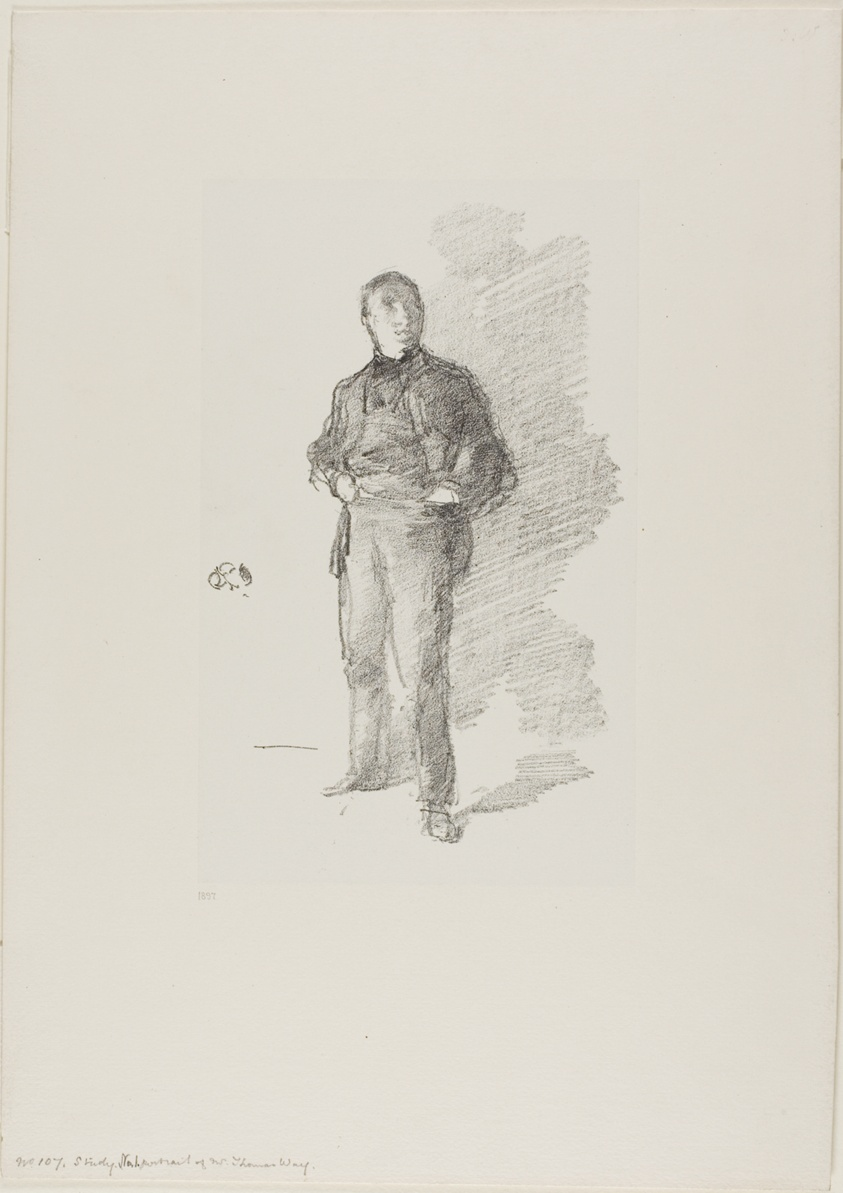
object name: Print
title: Study No. 1: Mr. Thomas Way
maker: James McNeill Whistler (American, 1834-1903)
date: 1896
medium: Transfer lithograph in black on ivory chine, laid down on off-white plate paper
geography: United States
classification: transfer lithograph; lithograph; print; prints and drawing; paper